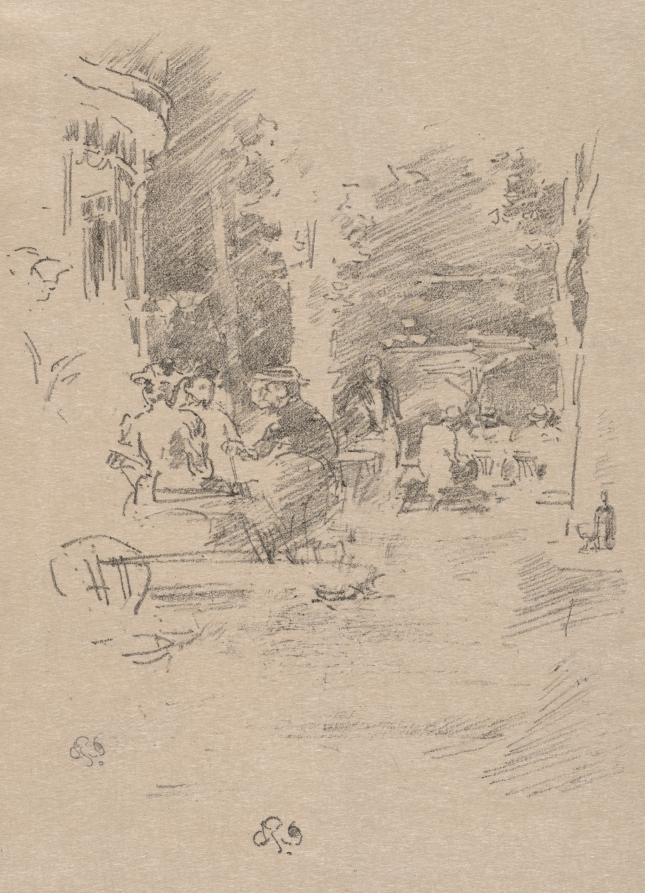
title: The Litte Café au Bois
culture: America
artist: James McNeill Whistler (American, 1834–1903)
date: 1894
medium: lithograph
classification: Print